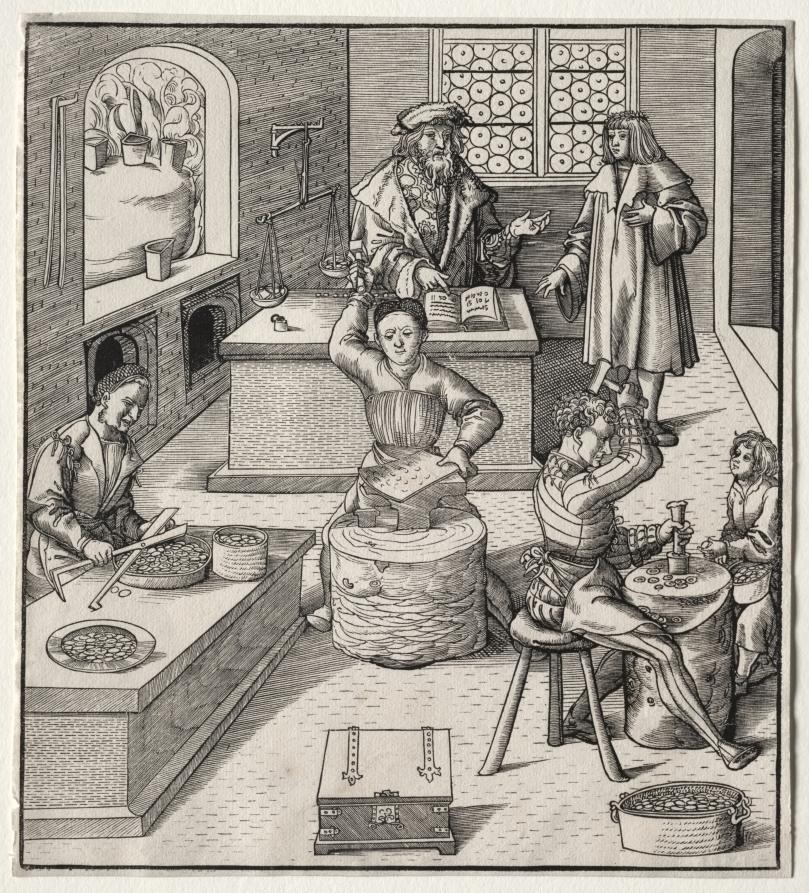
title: Young Maximilian in the Mint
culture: Germany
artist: Leonhard Beck (German, c. 1480–1542)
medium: woodcut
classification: Print